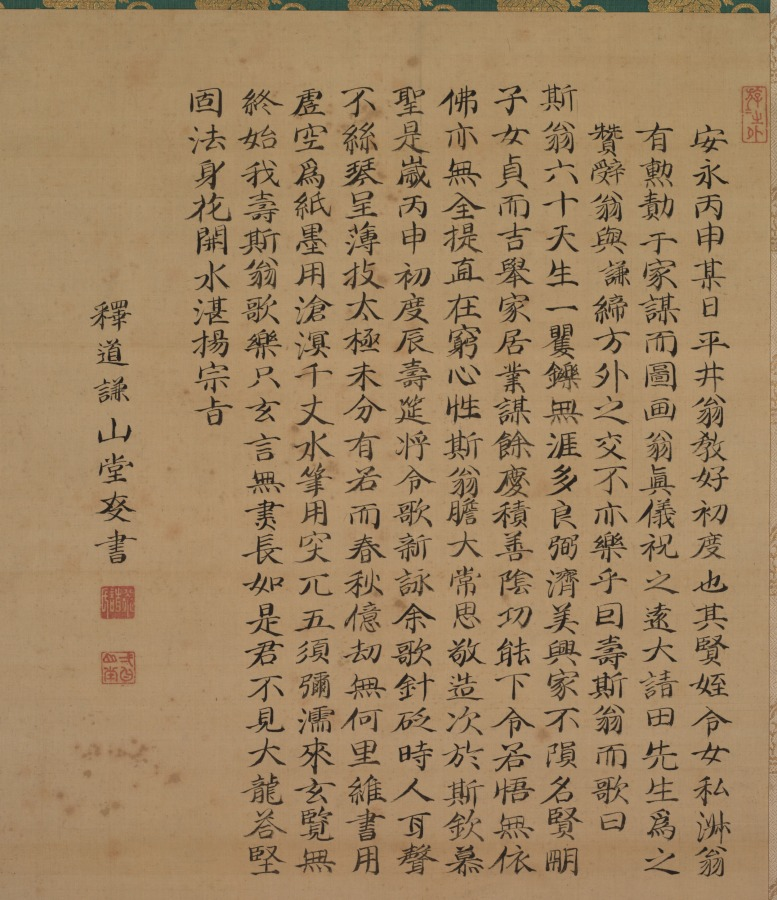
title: Portrait of Samurai-Official: Hirai KyoseiHirai Kyosei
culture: Japan, Edo period (1615–1868)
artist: Tsukioka Settei (Japanese, 1710–1786)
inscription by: Sando Hyosho (Japanese)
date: 1776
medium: hanging scroll; ink and color on silk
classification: Painting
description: In this pair of figure paintings, the artist provided generational portraits of two clan leaders from the Hirai family, accompanied by lengthy inscriptions in a distinctive calligraphic style from separate scholar-officials.